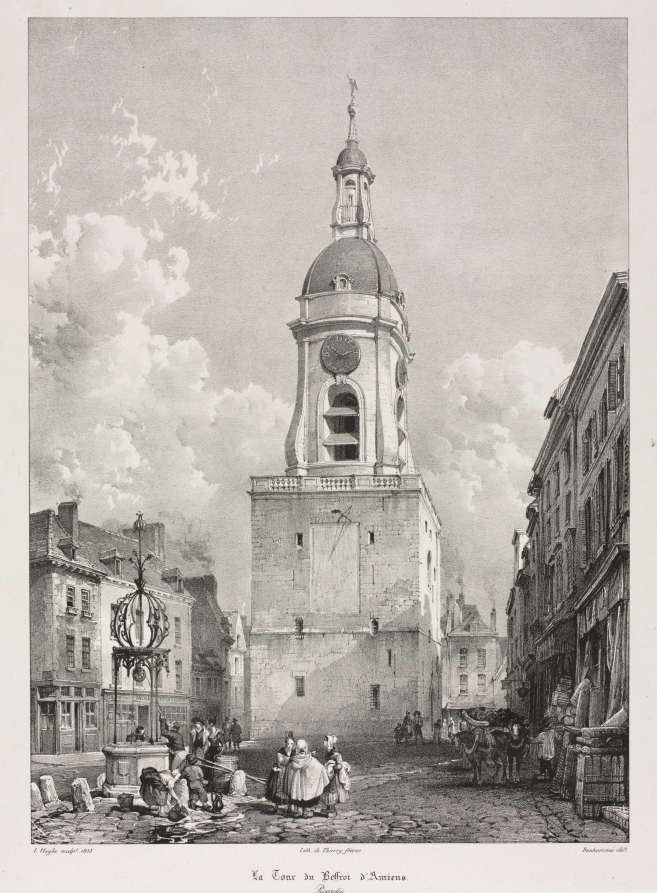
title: Picturesque and Romantic Travels in Old France, Picardie: The Belfry Tower of Amiens, Picardie (Voyages pittoresques et romantiques dans l'ancienne France, Picardie : La Tour du Beffroi d' Amiens, Picardie), after François Bonhommé (French, 1809-1881)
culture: England, 19th century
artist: Louis Haghe (British, 1806–1885)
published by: Thierry Brothers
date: 1835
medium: lithograph on chine colle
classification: Print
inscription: Inscribed on stone below image: "L. Haghe sculpt 1835. Lith. de Thierry Frères. Bonhomme delt / La Tour du Beffroi d'Amiens / Picardie"